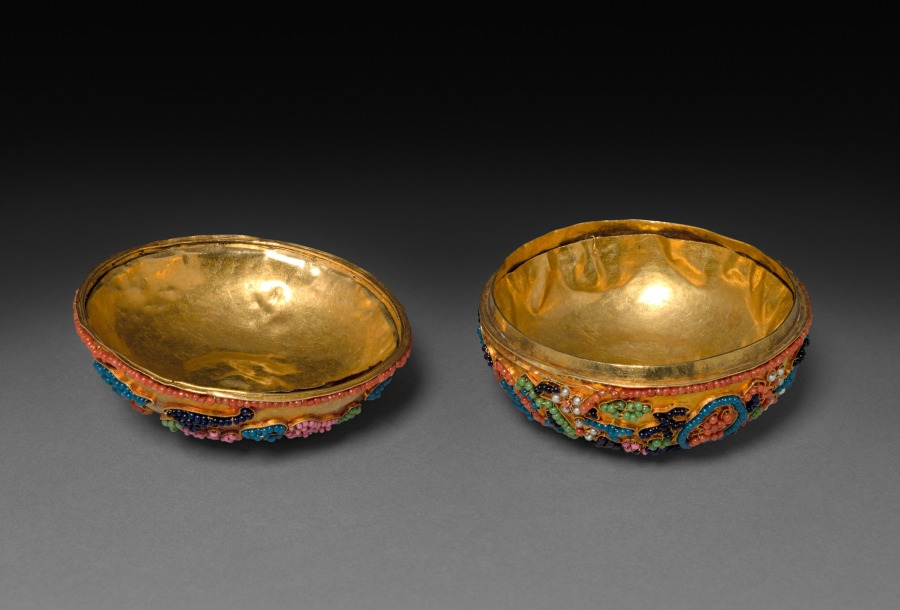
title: Box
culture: China, Qing dynasty (1644-1911)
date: 19th Century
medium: metal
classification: Metalwork